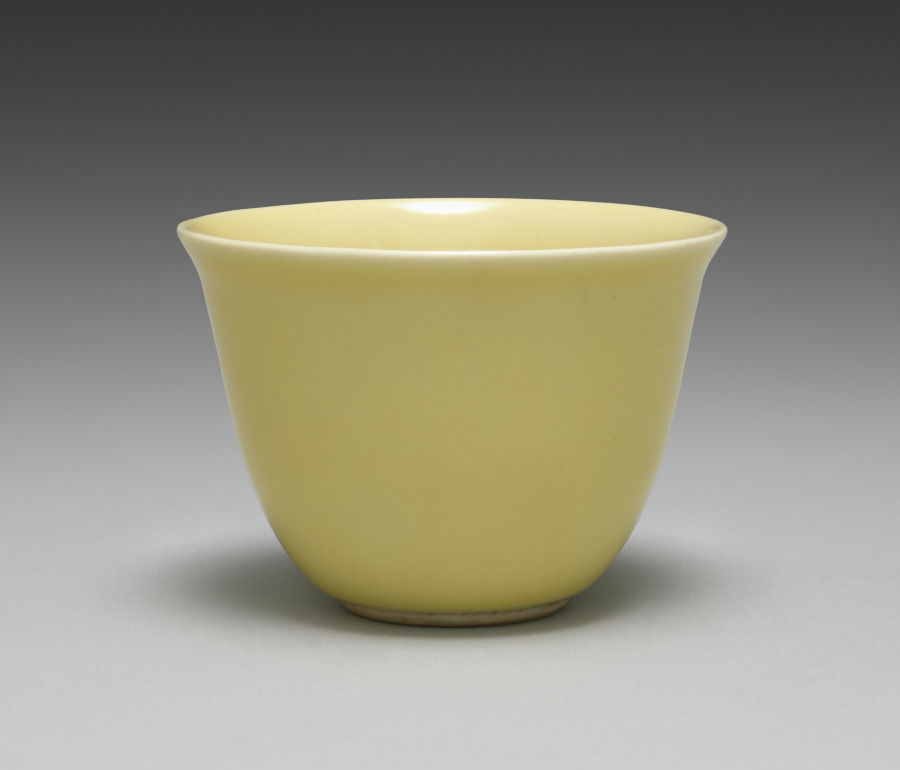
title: Cup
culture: Japan, Taishō period (1912–26) or Shōwa period (1926–89)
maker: Seifū Yohei IV (Japanese, 1872–1951)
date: 1914–46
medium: porcelain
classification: Ceramic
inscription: 清風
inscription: 清風造 【印】成山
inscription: 清風盧人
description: Like his father, Yohei IV also produced works with red or yellow monochrome glazes. His yellow-glazed works include this set of five drinking cups, a pair of sake pourers CMA 2022.216, and a sweets bowl molded into the shape of a chrysanthemum CMA 2022.218.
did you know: Seifū Yohei IV learned the ceramics industry from his father and painting from Tanomura Shosai.